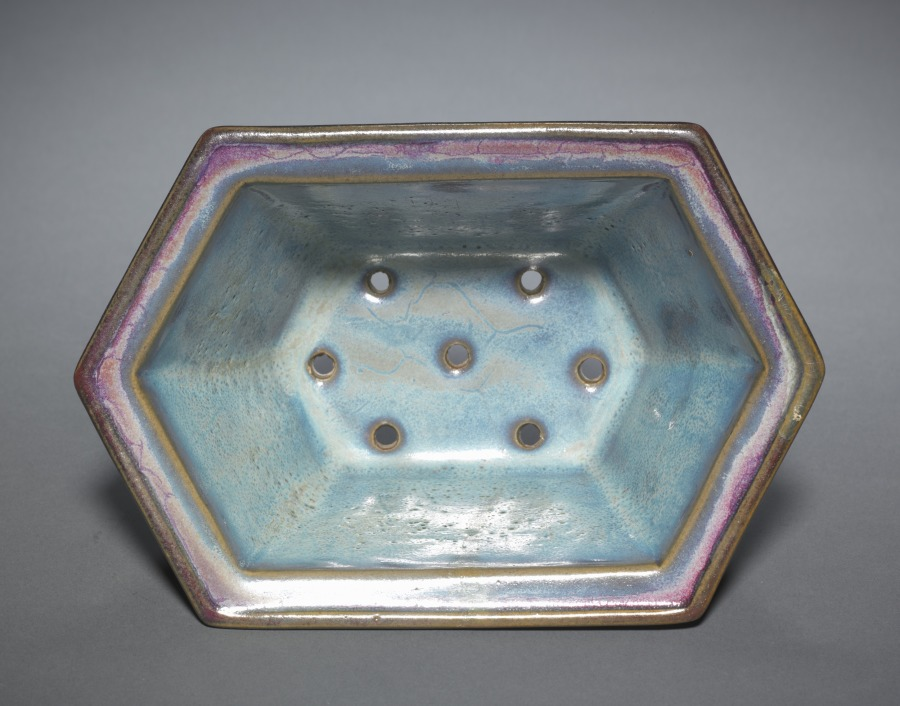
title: Hexagonal Flower Pot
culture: China, Henan province, Yuxian, Juntai, Ming dynasty (1368-1644)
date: 1300s–1400s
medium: porcelaneous stoneware, numbered Jun ware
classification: Ceramic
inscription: 八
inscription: 明窓用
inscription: 養心殿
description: This deep hexagonal flowerpot, one of a pair in the collection, is numbered "8" and bears additional inscriptions to indicate specifically the location of its usage within the palace: "for use in the Study of Illumination (Mingchuang yong)" within the "Hall of Cultivating the Mind (Yangxin Dian)" of the Forbidden City. The inscriptions seem to suggest the Qing imperial provenance of this flower pot.